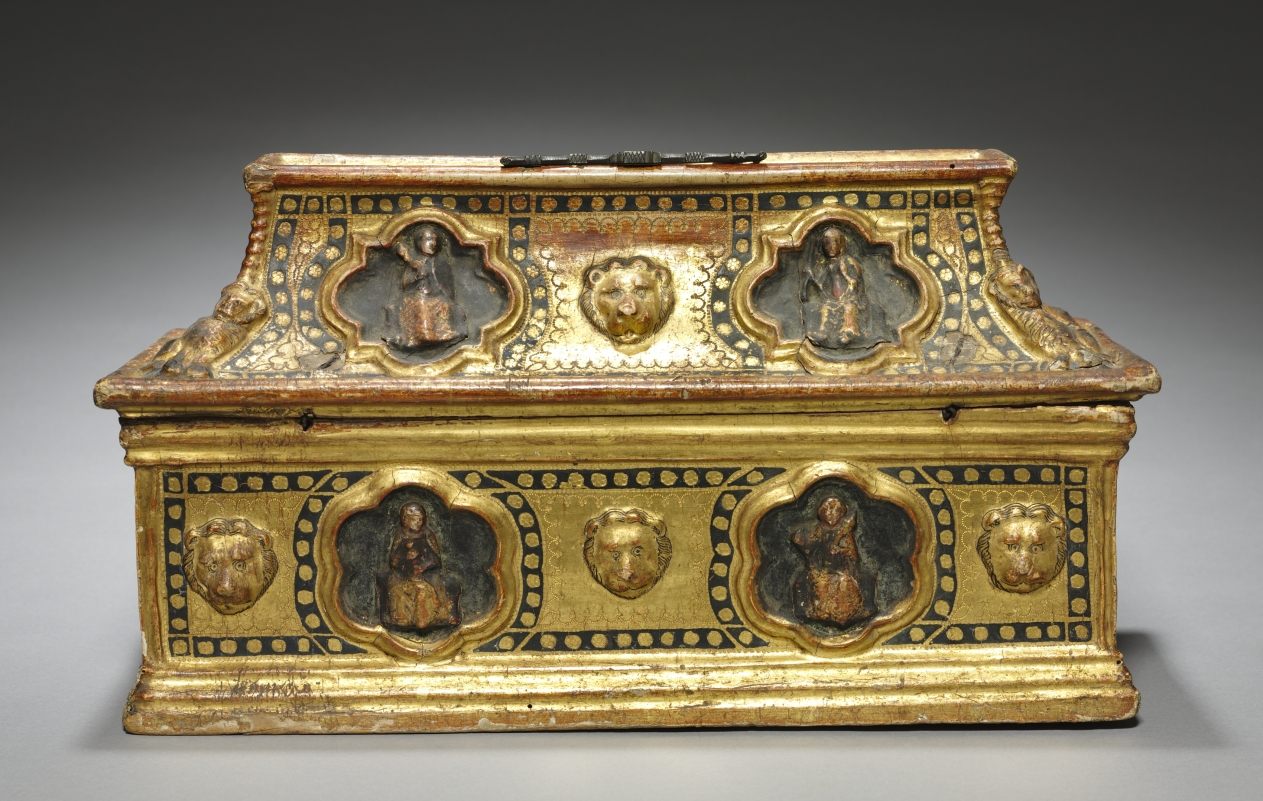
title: Casket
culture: Italy, Siena(?)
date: late 1300s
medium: painted and gilded gesso on wood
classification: Furniture and woodwork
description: This casket is one of only a few of its kind to survive in such a fine state of preservation. A variety of such caskets were used in wealthy homes to store jewelry, seals, mirrors, and combs. A keyhole lock is provided for security. Caskets like this were often highly decorated and given to women as gifts.